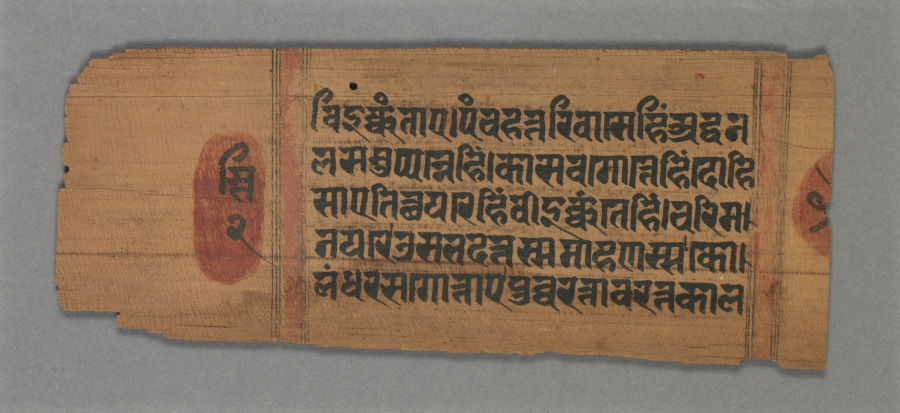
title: Text: Folio 2 (verso), from a Kalpa-sutra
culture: Western India, Gujarat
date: c. 1275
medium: gum tempera and ink on paper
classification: Painting